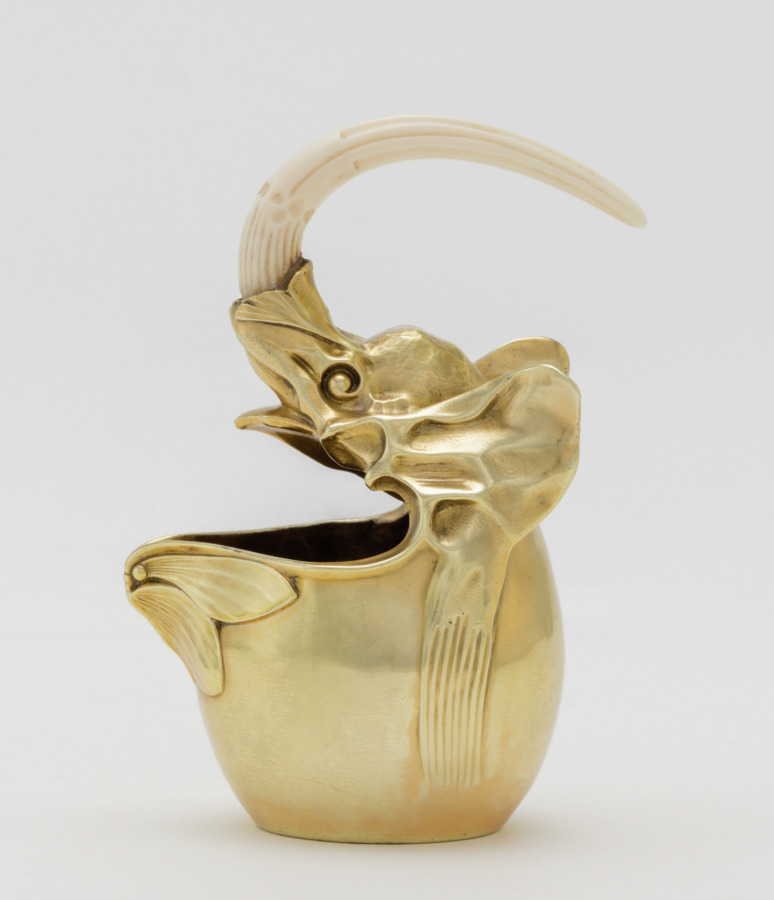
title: Creamer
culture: France, Paris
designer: Carlo Bugatti (Italian, 1856–1940)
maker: Adrien-Aurélien Hebrard (French, 1866–1937)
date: c. 1907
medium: Gilt silver and ivory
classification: Silver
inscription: Made by A. A. Hebrard Firm, Paris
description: This tea and coffee service, salver, and table, together with some now missing cups, were all designed by Carlo Bugatti as an ensemble and presented at the 1902 exposition devoted to decorative arts in Turin, Italy. The set was probably acquired from Bugatti's 1907 exhibition at the Galerie Hébrard in Paris by a wealthy South African widow, Anna Blake, who was living there at the time. Some of the animal and insect motifs suggest mythical beasts or the fossils of prehistoric animals. When Mrs. Blake returned to Cape Town, she took these and other pieces designed by Bugatti with her, and they remained in South Africa throughout her lifetime.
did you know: This creamer is part of a tea and coffee service designed by Carlo Bugatti.